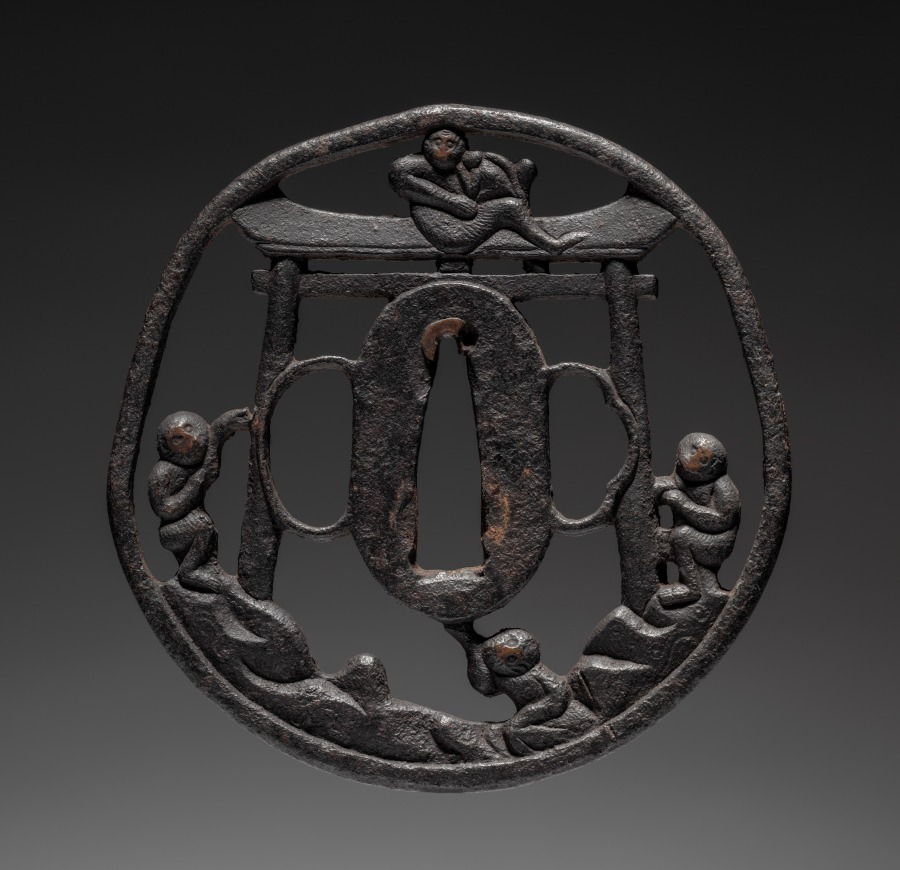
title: Sword Guard (Tsuba) with Hiyoshi Taisha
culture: Japan, possibly Edo period (1615-1868)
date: c. 1615–1868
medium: iron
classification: Arms and Armor